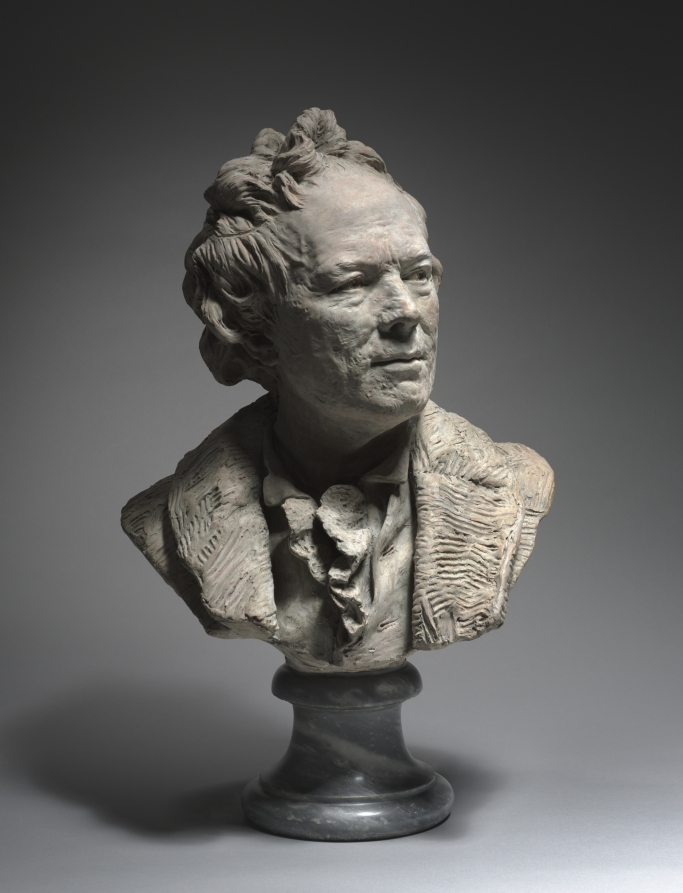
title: Portrait of Christoph Willibald Gluck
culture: France, 18th century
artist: Jean-Antoine Houdon (French, 1741–1828)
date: c. 1775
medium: terracotta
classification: Sculpture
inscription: inscribed in plaster fill in back at bottom: Houdon FT 177[4?]. Since this inscription was clearly added after the terracotta was fired, it cannot be considered a signature.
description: A well-known composer of the 1700s, Gluck reformed opera by bringing unprecedented simplicity and sincerity to his music and staging, qualities shared by Houdon’s bust. This portrait, by depicting Gluck’s pockmarked face, was perceived as a natural and truthful representation. Yet, he would never have appeared publicly with unkempt hair and an open collar, which constituted the standard for representing an artist.